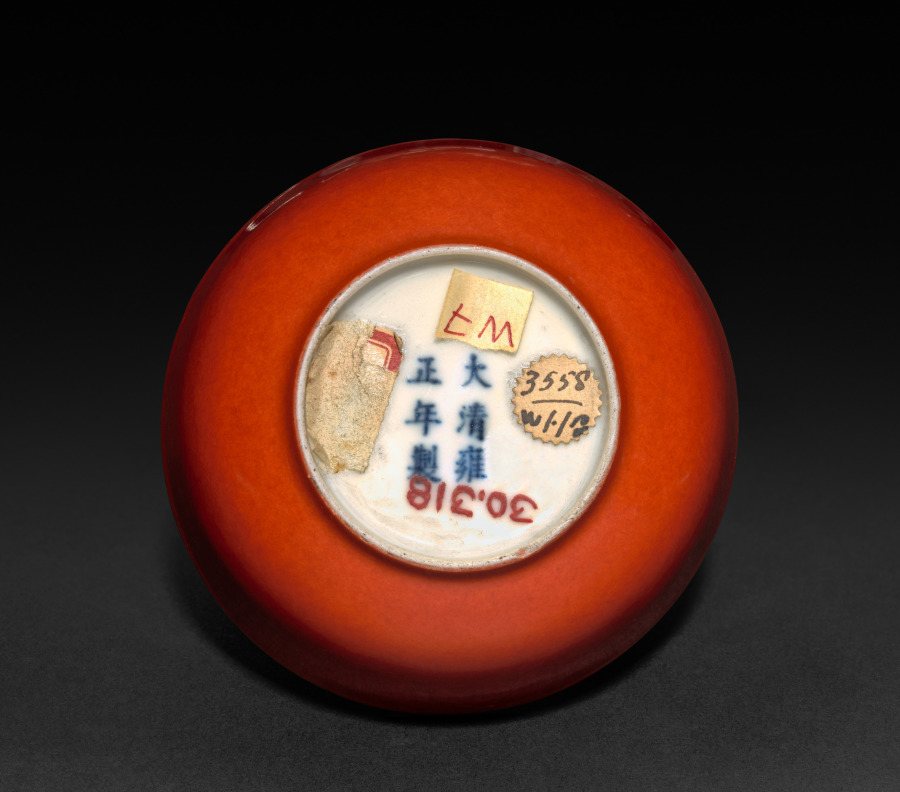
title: Bowl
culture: China, Jiangxi province, Jingdezhen kilns, Qing dynasty (1644-1911), Yongzheng reign (1722-35)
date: 1723–35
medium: porcelain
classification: Ceramic